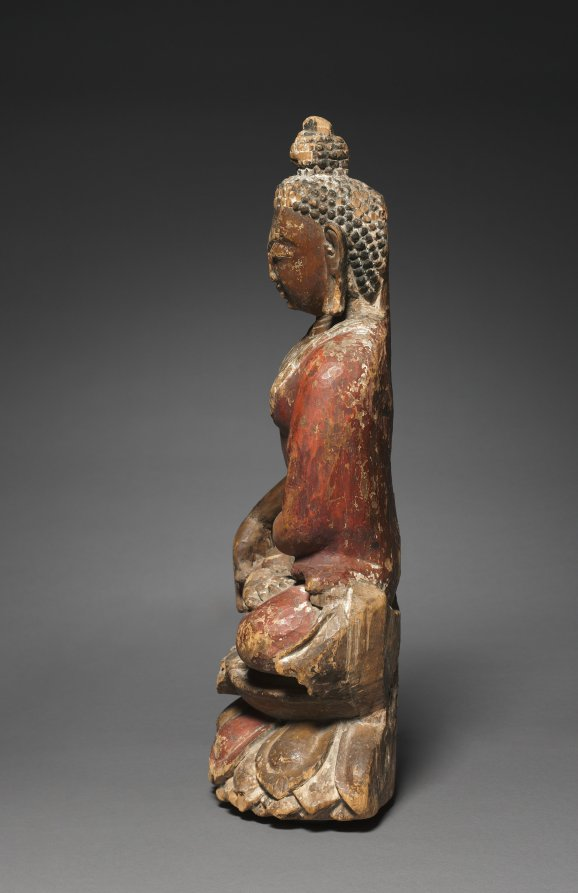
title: Seated Buddha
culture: Western Himalayas, possibly Ladakh or Lahul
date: 1000s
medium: painted wood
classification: Sculpture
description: Eleventh-century western Tibet experienced a period of fervent reconstruction of Buddhist monasteries following the persecution of Buddhism during the 9th and 10th centuries. Art from Kashmir was avidly collected and copied as part of those reconstruction efforts. Kashmiri stylistic traits, such as the pinched waist and abdominal musculature seen in this rare wooden image, are from that critical time. The pioneering Italian Tibetologists Giusseppe Tucci and Egenio Ghersi discovered this sculpture during an expedition to Tibet from 1933 to 1935